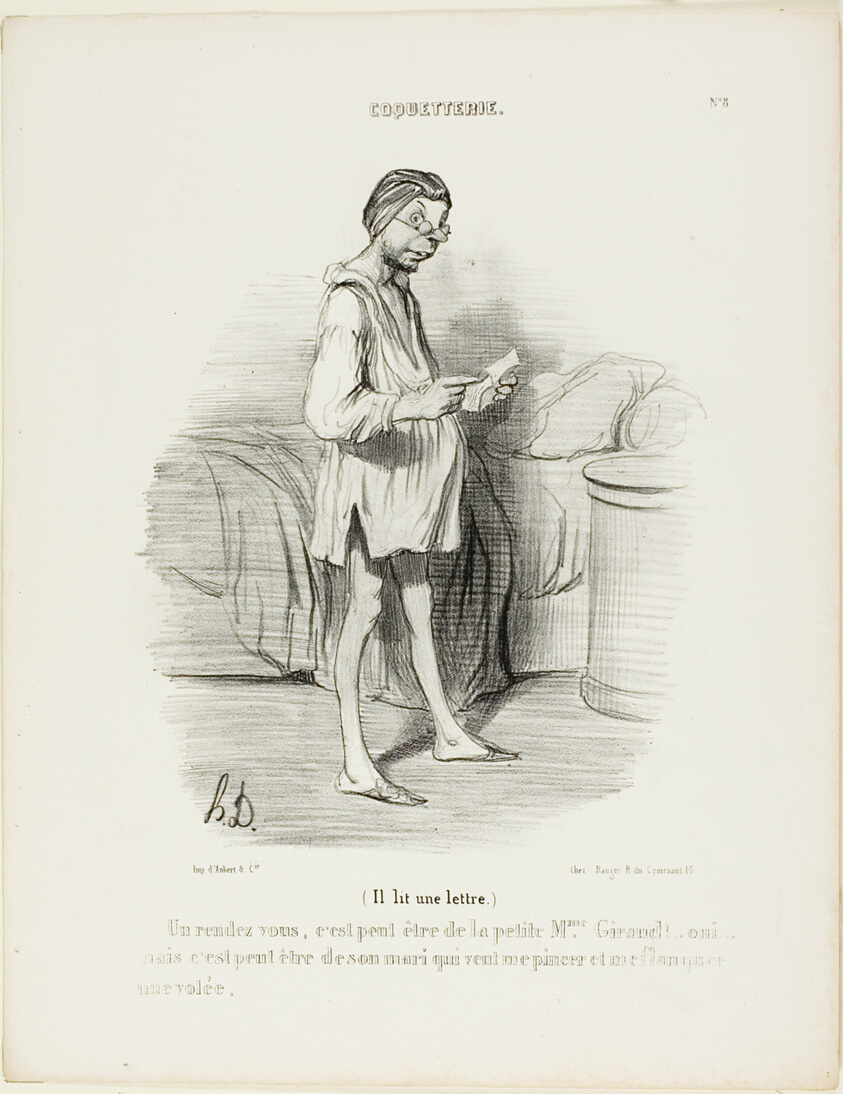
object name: Print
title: (He is reading a letter) “A date, could it be from the cute Mme Giraud?? Yes, but it could also come from her husband who wants to pinch me…,” plate 8 from Coquetterie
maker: Honoré Victorin Daumier; French, 1808-1879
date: 1840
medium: Lithograph in black on off-white wove paper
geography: France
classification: lithograph; print; prints and drawing